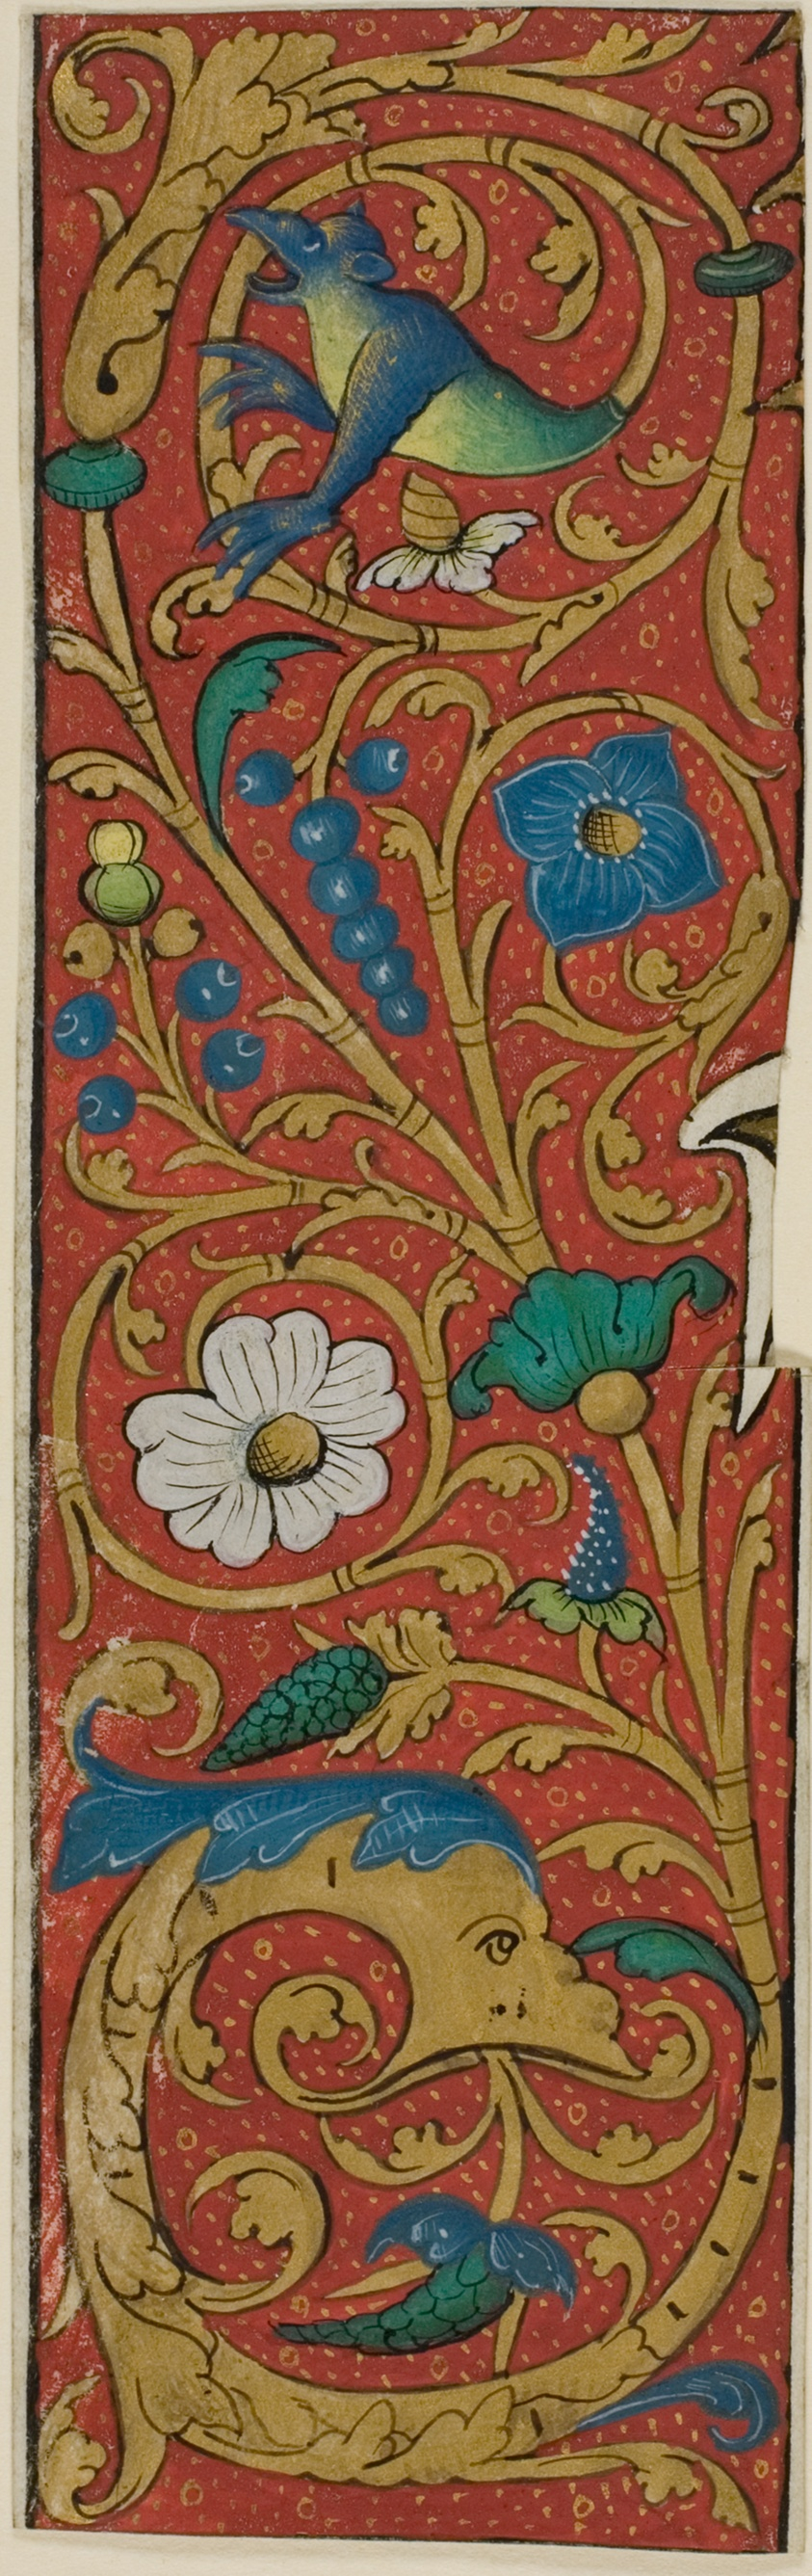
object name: Drawing and Watercolor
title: Illuminated Border with Grotesques and Flora from a Manuscript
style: medieval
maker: French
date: 15th or early 16th century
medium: Manuscript cutting in tempera and gold leaf on vellum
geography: France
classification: tempera; manuscript; drawings (visual works); prints and drawing